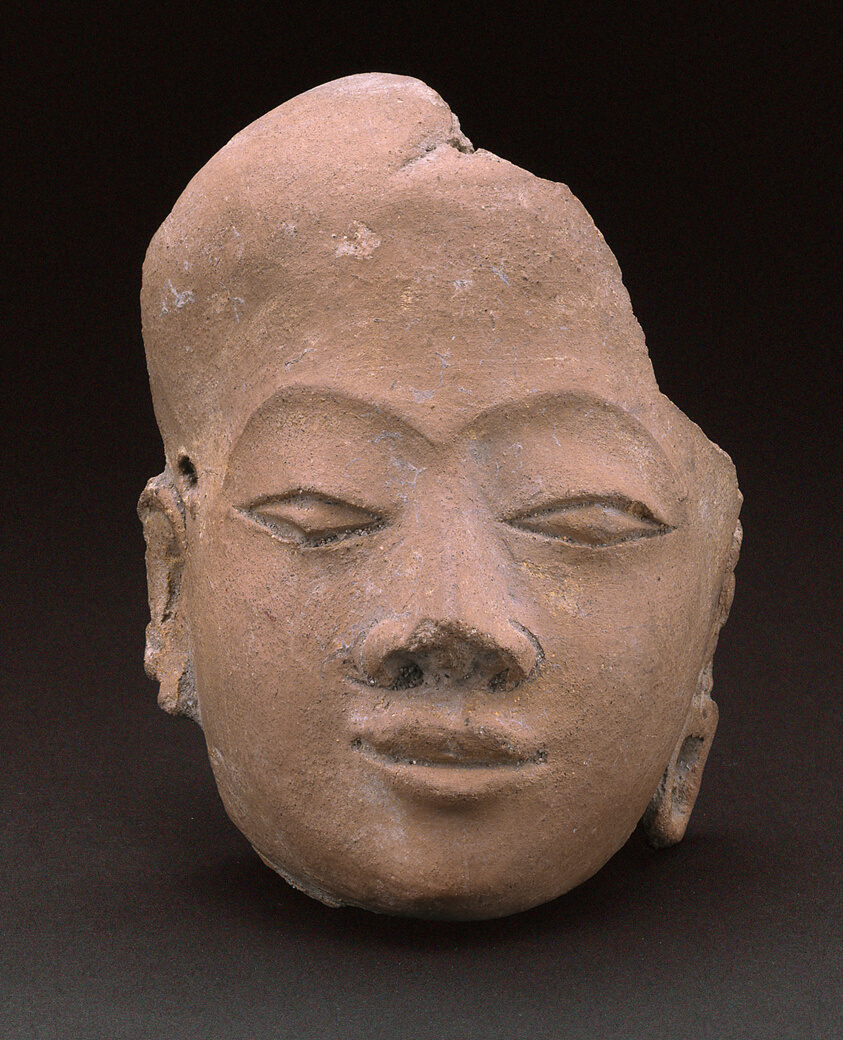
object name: Sculpture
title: Fragment of a Face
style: Southeast Asian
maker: Indonesia; Eastern Java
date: 14th/15th century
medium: Terracotta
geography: Eastern Java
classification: earthenware; ceramics; sculpture; asian art